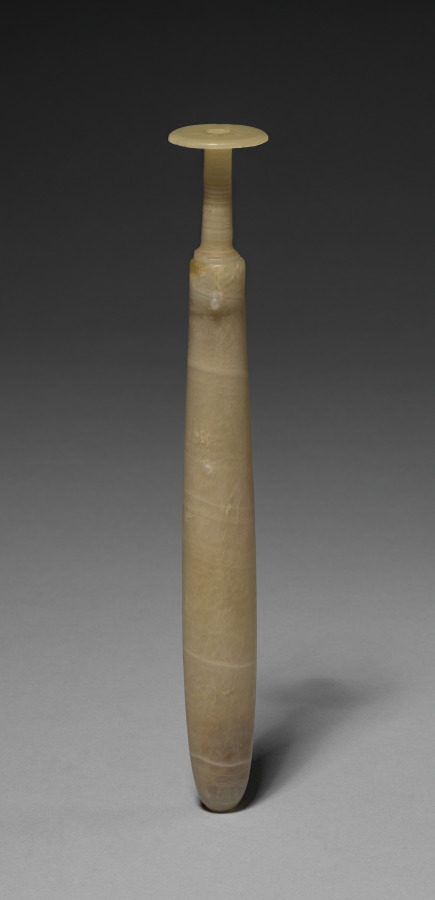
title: Alabastron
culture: Egypt, Greco-Roman period (332 BCE–395 CE), Ptolemaic dynasty (305–30 BCE)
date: 305–222 BCE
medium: travertine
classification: Vessels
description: Both ancient Egyptian men and women loved cosmetics. Unguents, oils, and perfumes made from aromatic plant resins and gums were obtained at great cost from distant lands. The objects identified with cosmetics were given lavish treatment.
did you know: This perfume holder might have been attached to a string, making it easily portable.